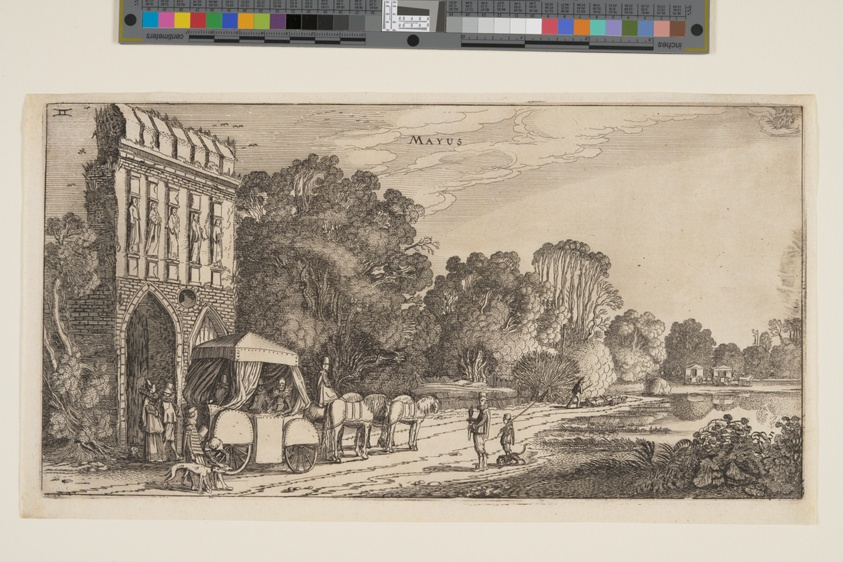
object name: Print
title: May, from The Twelve Months of the Year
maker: Jan van de Velde II (Dutch, c. 1593–1641); after Willem Buytewech (Dutch, c. 1591–1624)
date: 1616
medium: Etching on ivory laid paper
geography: Netherlands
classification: etching; paper; print; prints and drawing